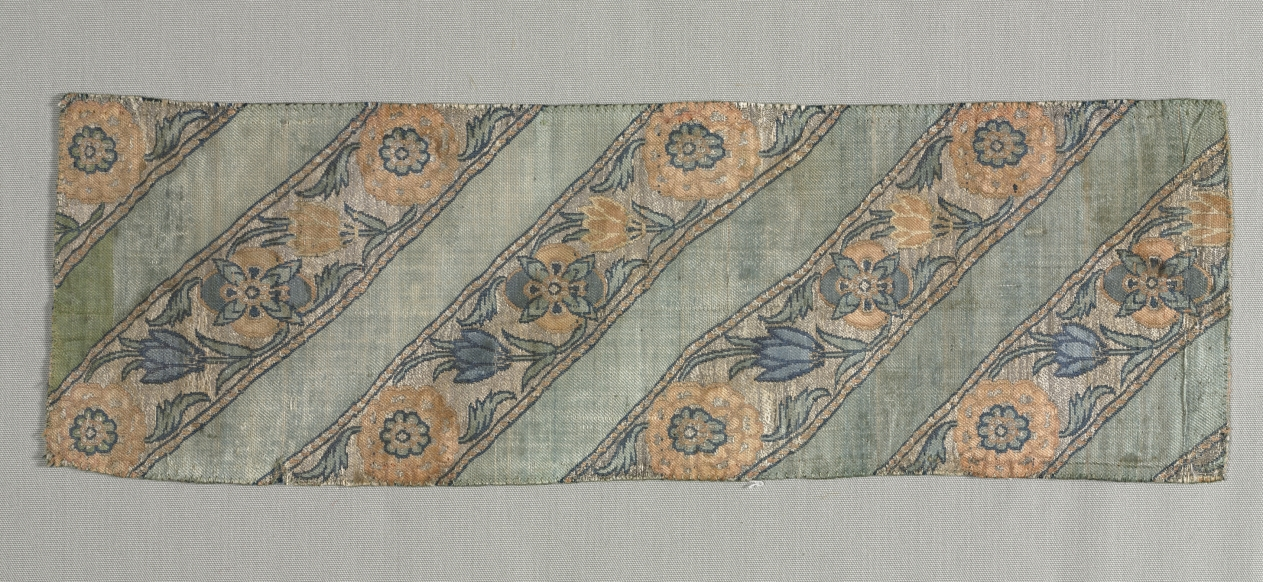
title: Fragment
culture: Iran, 17th century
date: 1600s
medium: brocade; silk and metal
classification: Textile